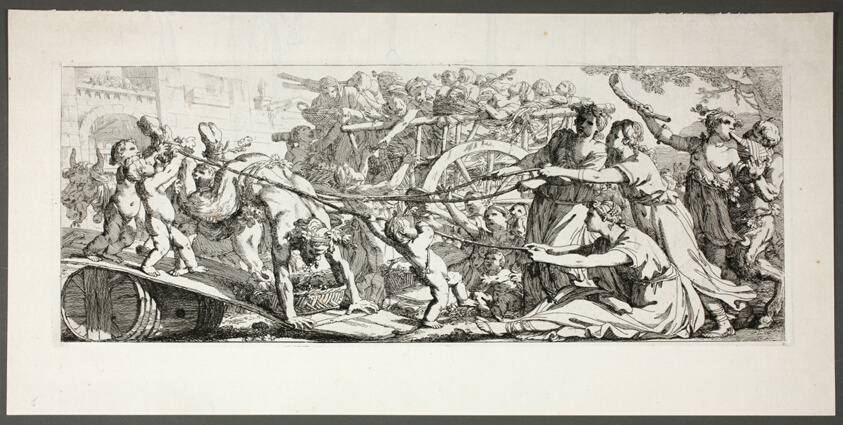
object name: Print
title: Return from the Vineyards, plate three of four from Le Travaux de la Vendange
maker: Joseph-Marie Vien, the elder; French, 1716–1809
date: 1750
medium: Etching on paper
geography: France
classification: etching; print; prints and drawing